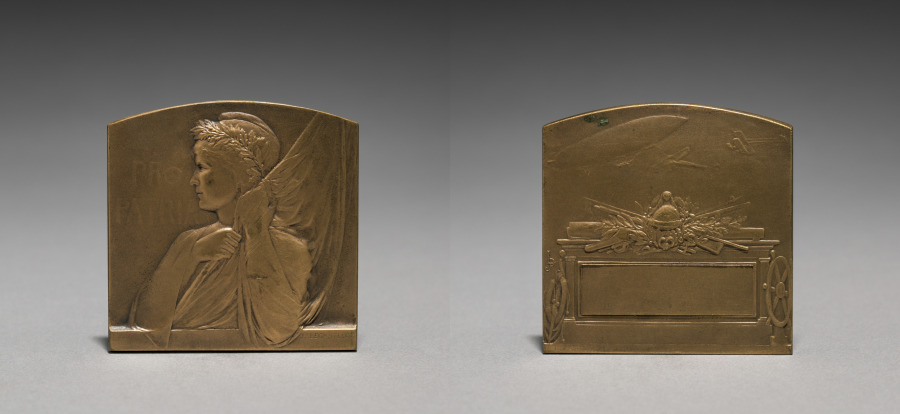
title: Medal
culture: France, 19th century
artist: Jules Prosper Legastelois (French, 1855–1931)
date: 1913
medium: bronze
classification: Metalwork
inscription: "Pro Patria."